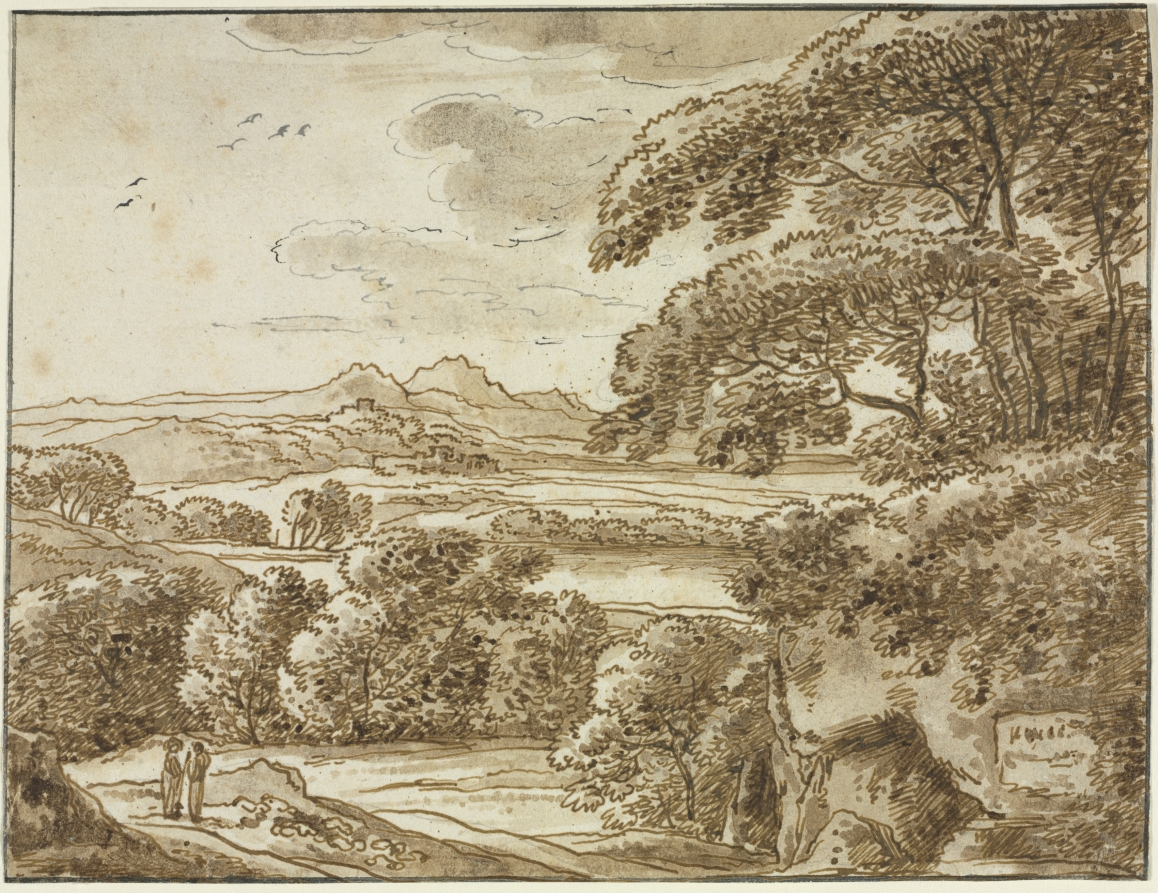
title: Landscape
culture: Germany, 18th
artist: Franz Kobell (German, 1749–1822)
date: c 1780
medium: pen and ink with wash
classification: Drawing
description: Franz Kobell was one of the most prolific draftsman working in Germany in the late 18th and early 19th century. His interest in the Italianate landscape intensified following visits to Rome in 1779 and 1784. This drawing may have been executed in Italy, but it is impossible to be certain. His drawings often depict sweeping vistas with rocky outcroppings, such as in this sheet. The overwhelming vista contrasts with the tiny classical figures, emphasizing man's insignificance in nature.